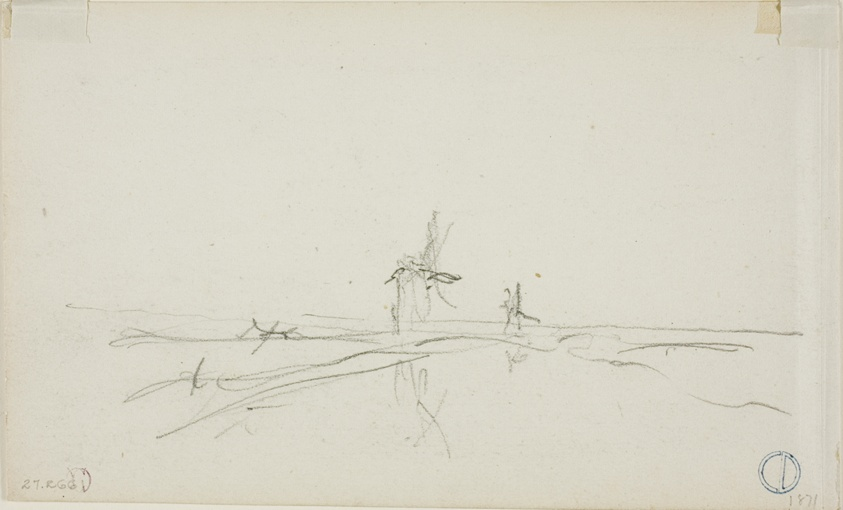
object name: Drawing and Watercolor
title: Landscape in Holland (recto); Sketch of Windmills by Water (verso)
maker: Charles François Daubigny (French, 1817-1878)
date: 1837/78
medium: Graphite (recto and verso) on ivory wove paper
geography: France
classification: graphite; drawings (visual works); prints and drawing